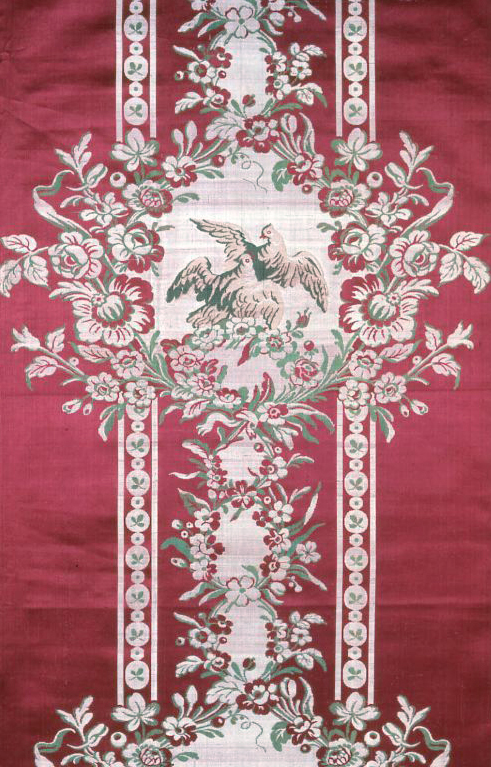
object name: Textile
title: Panel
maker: Designed by Philippe de LaSalle (French, 1723–1803/5); France, Lyon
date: c. 1770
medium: Silk, satin weave with brocading wefts and plain interlacing of secondary binding warps and self-patterning ground wefts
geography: France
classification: textile; weaving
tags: birds, animals, foliage